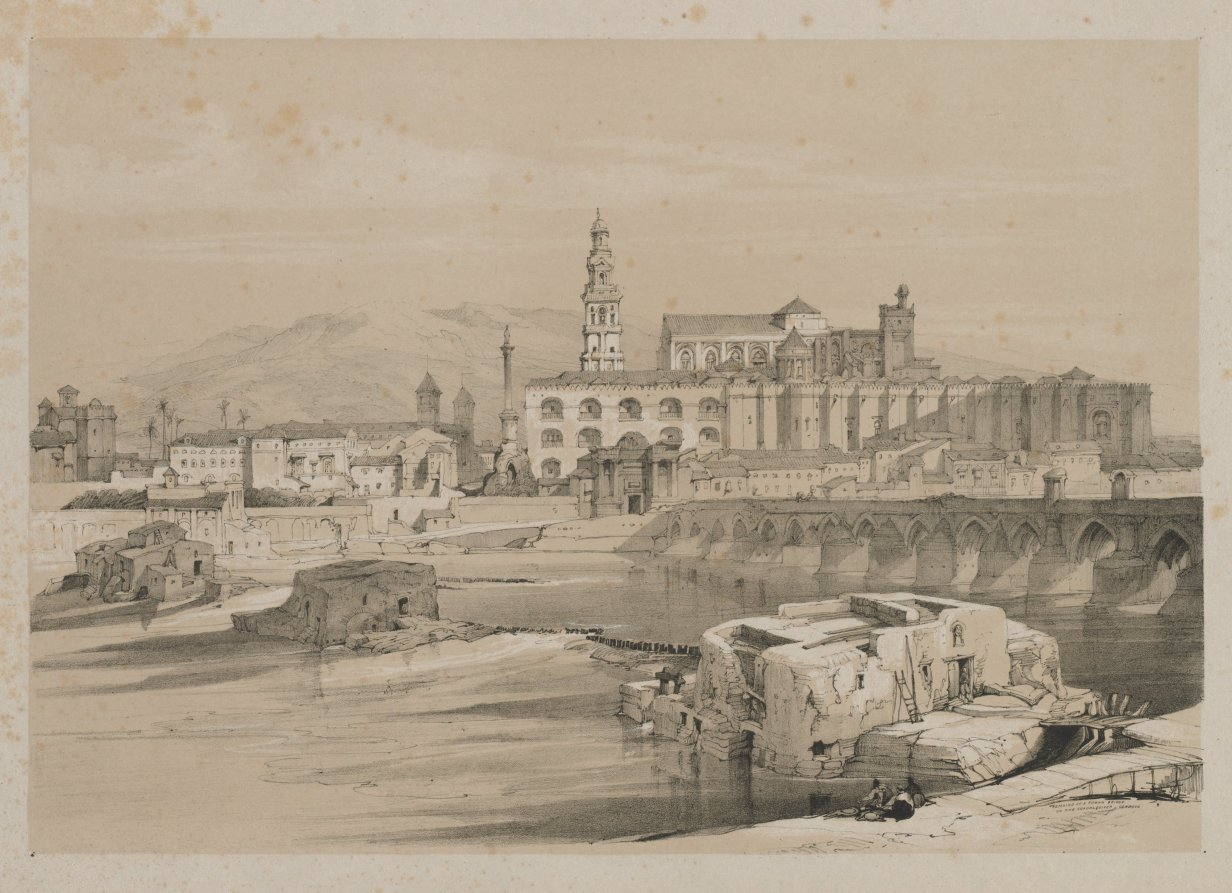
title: Picturesque Sketches in Spain: Remains of a Roman Bridge on the Guadalquiver, Cordova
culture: England, 19th century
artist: Thomas Shotter Boys (British, 1803–1874)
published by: Hodgson & Graves, 6, Pall Mall, London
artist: after David Roberts (Scottish, 1796–1864)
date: 1837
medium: color lithograph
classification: Print